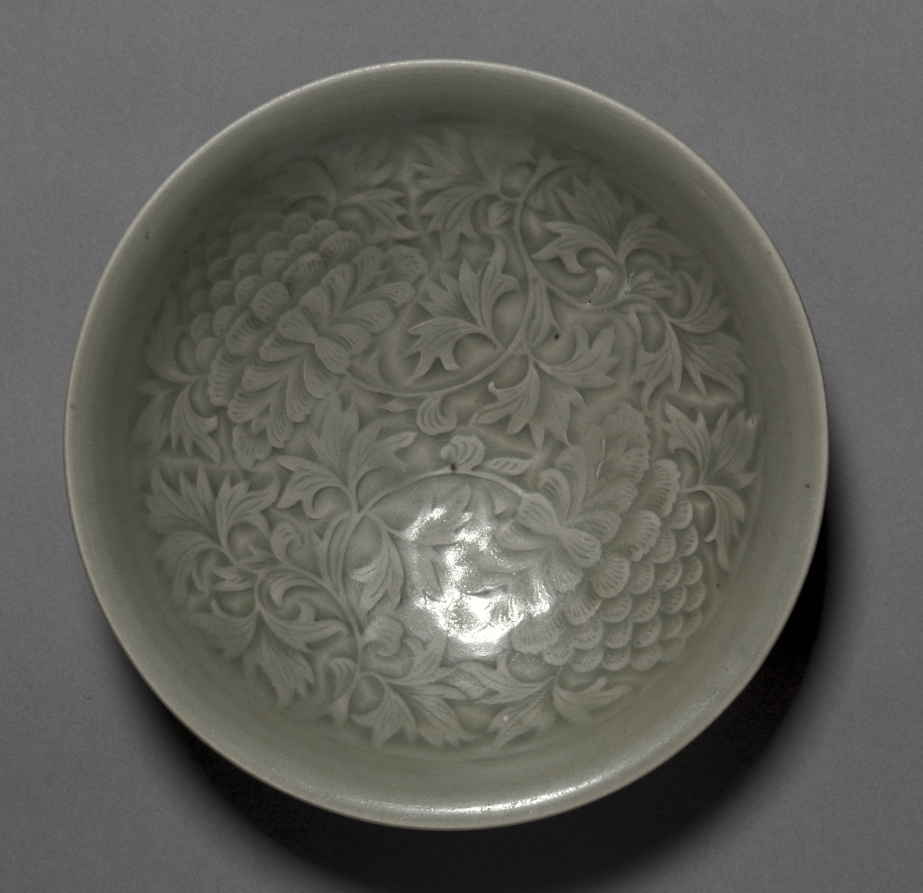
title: Bowl with Peonies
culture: China, Shaanxi province, Tongchuan, Huangbaozhen, Jin dynasty (1115-1234)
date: c. 1100s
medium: green-glazed stoneware with molded decoration, Yaozhou ware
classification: Ceramic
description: This type of pottery, called Yaozhou ware, is a type of celadon or greenware that is well-known for its distinctive molded decoration.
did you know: In East Asian art, peonies traditionally symbolize prosperity and wealth.